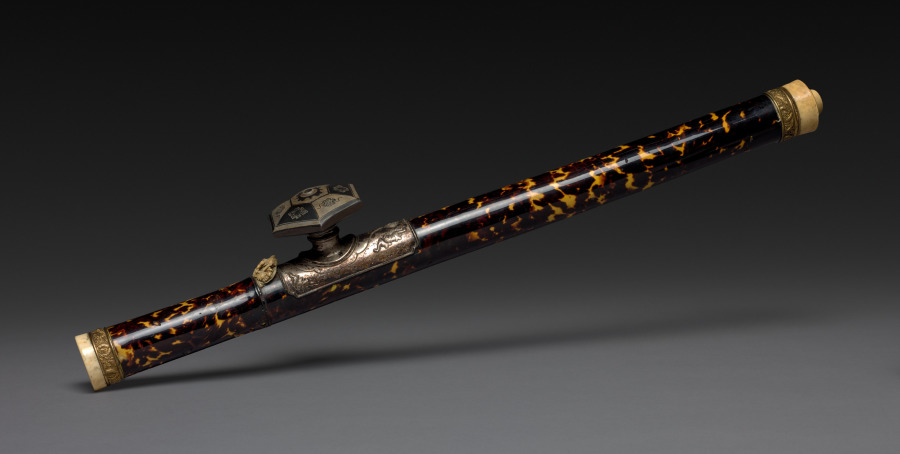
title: Opium Pipe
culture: China, Qing dynasty (1644-1911)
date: 1800s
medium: imitation tortoise-shell with gilt silver and silver decoration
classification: Miscellaneous